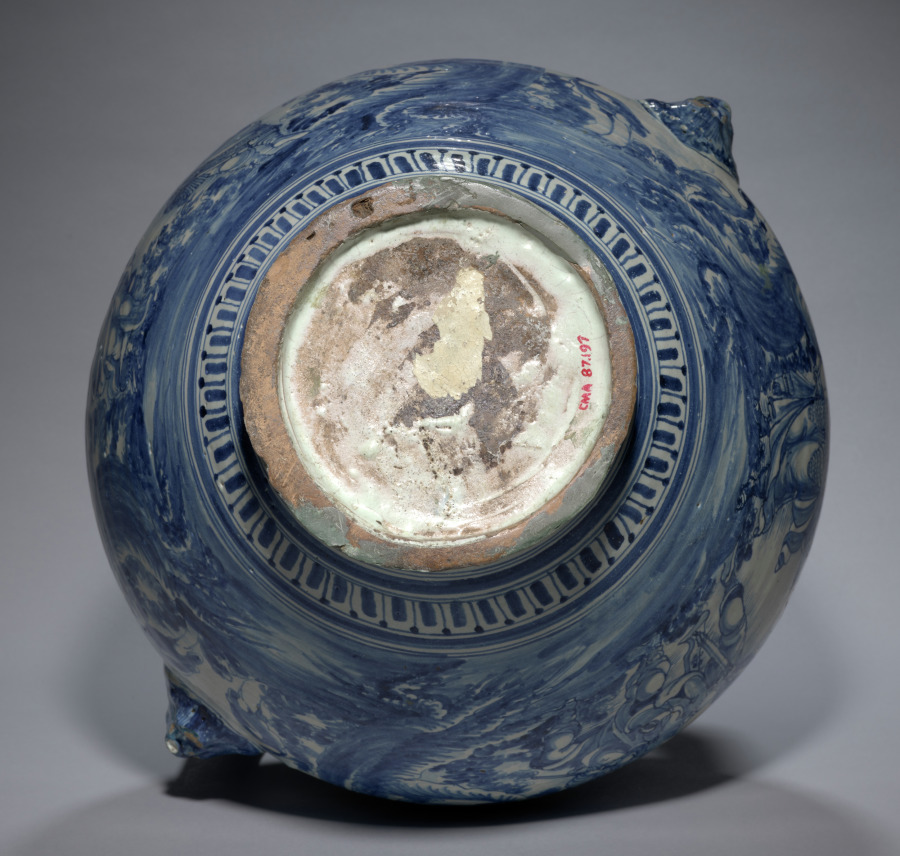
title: Two-Handled Jar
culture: Spain, Talavera, 17th century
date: early 1600s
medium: tin-glazed earthenware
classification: Ceramic